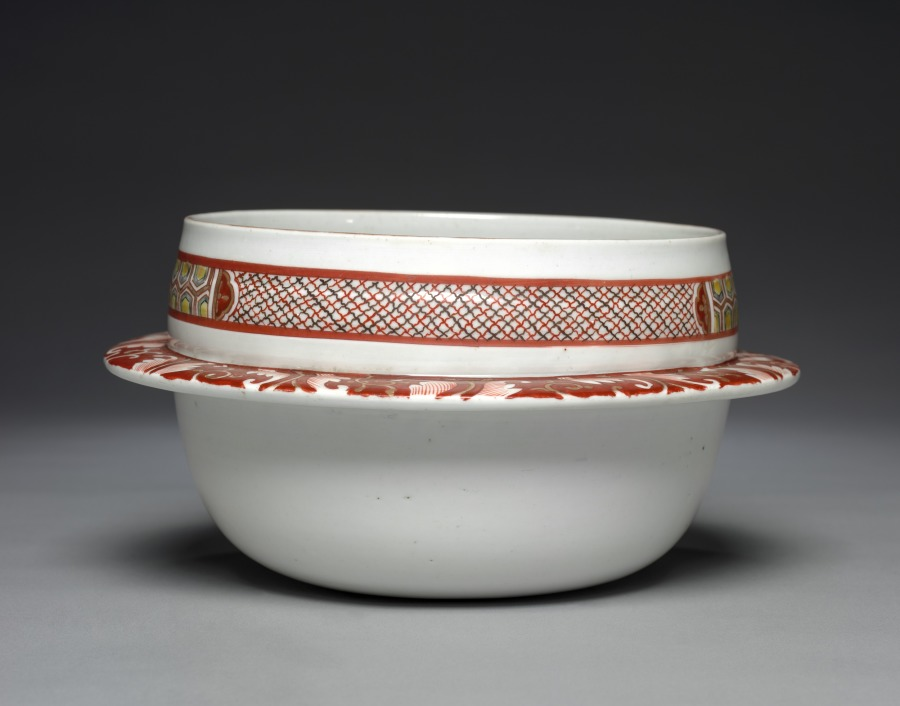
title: Rice Container: Ko Imari Type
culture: Japan, Edo period (1615–1868)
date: late 1600s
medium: porcelain with overglaze enamel and gold decoration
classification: Ceramic